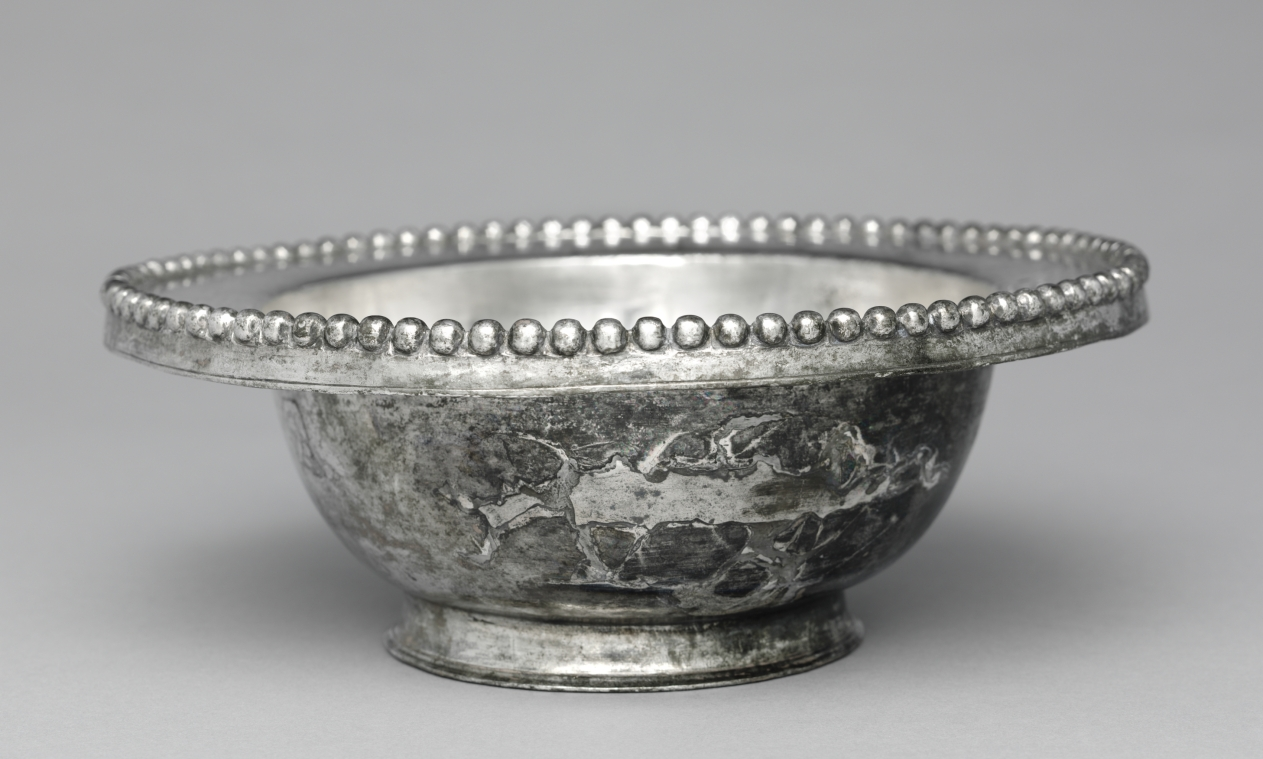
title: Bowl with Beaded Rim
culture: Byzantium, Syria(?), Byzantine period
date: 300–500 CE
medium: silver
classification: Metalwork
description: This bowl was probably intended for use in a private home, perhaps a fashionable villa on the Mediterranean coast. Wealthy Romans stored a variety of silver vessels and implements for entertaining and enjoyed using them while eating and drinking at social events. This bowl is decorated with a beaded rim, a feature often found on domestic silver bowls of this period. The basic shape was formed first by hammering. Then the bowl was polished and chased while it turned on a lathe. The beaded decoration was achieved by hammering the silver into a mold.